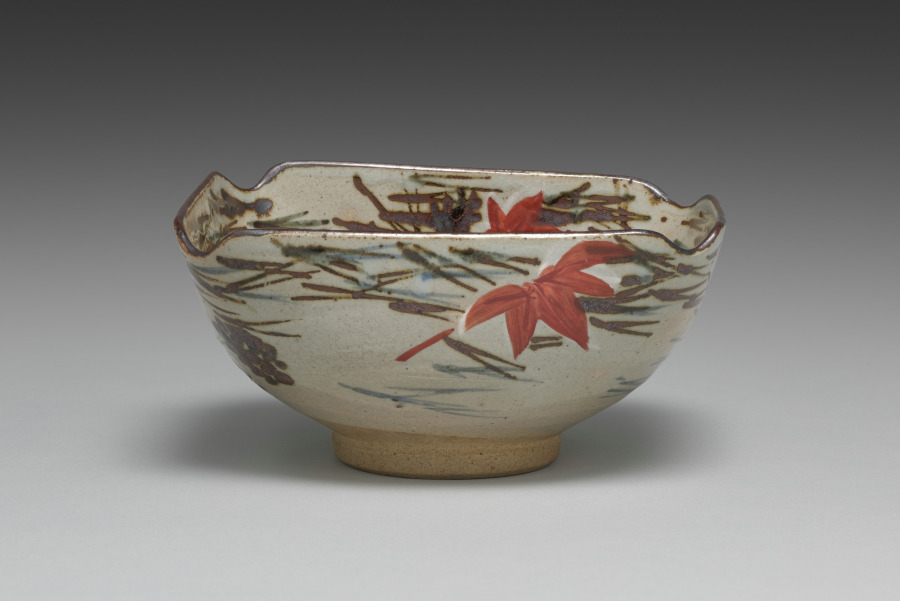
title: Nesting Dish with Scattered Pine Needles and Maple Leaves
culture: Japan, Edo period (1615–1868)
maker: Seifū Yohei I (Japanese, 1801–1861)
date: 1861–78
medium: One of a pair of side dishes; stoneware with underglaze blue and iron oxide, white slip, and overglaze color enamel (Kyoto ware)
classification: Ceramic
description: Seifū Yohei I made both blue and white porcelains after Ming dynasty (1368–1644) Chinese wares fired in the kilns at Jingdezhen for export. He also made colorful stoneware in the style of his teacher, Nin’ami Dōhachi (Takahashi Dōhachi II) (1783–1855).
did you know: Where he intended to place the maple leaves, Yohei I first applied a white color, which can be seen around the leaf edges under the glaze. This layering on top of the white brightens the color of the translucent red overglaze.